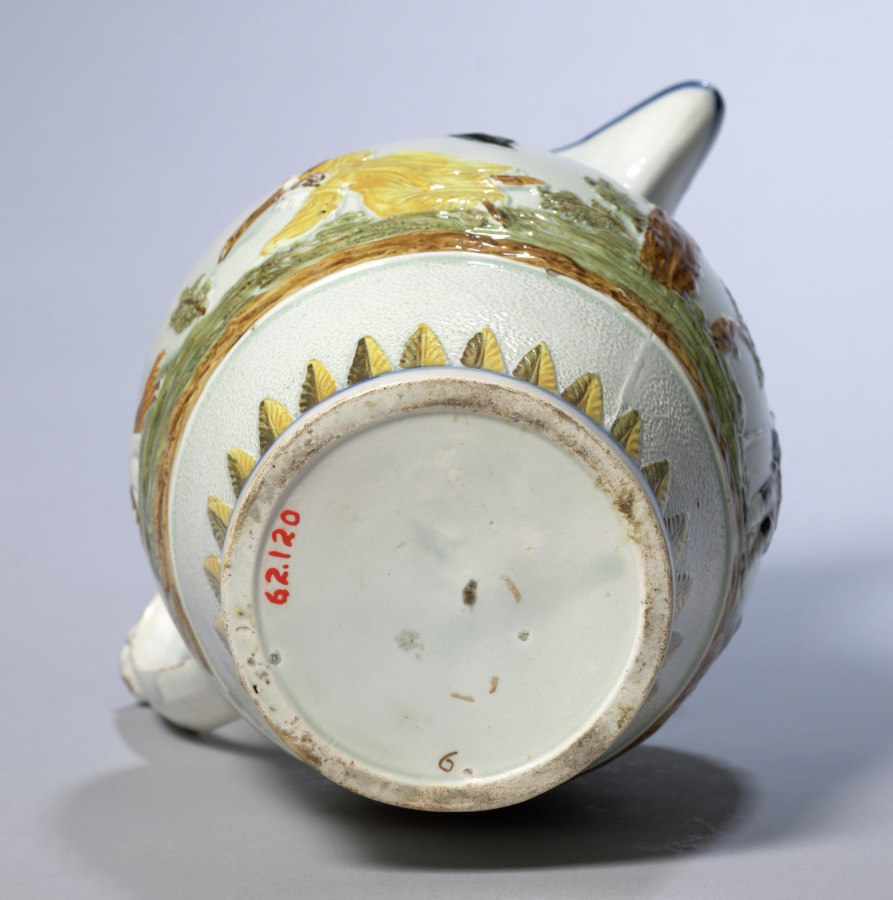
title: Jug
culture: England, Staffordshire, late 18th-early 19th Century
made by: Staffordshire Factory (British)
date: c. 1800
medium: earthenware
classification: Ceramic